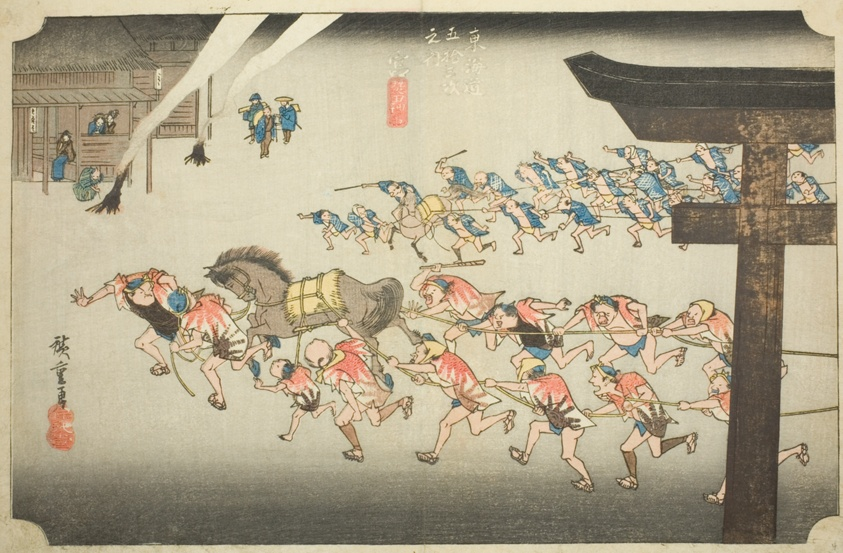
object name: Print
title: Miya: Religious Festival at Atsuta Shrine (Miya, Atsuta shinji), from the series "Fifty-three Stations of the Tokaido (Tokaido gojusan tsugi no uchi)," also known as the Hoeido Tokaido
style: Japanese (culture or style)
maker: Utagawa Hiroshige 歌川 広重; Japanese, 1797-1858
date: c. 1833/34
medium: Color woodblock print; oban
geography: Japan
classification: woodblock print; print; asian art